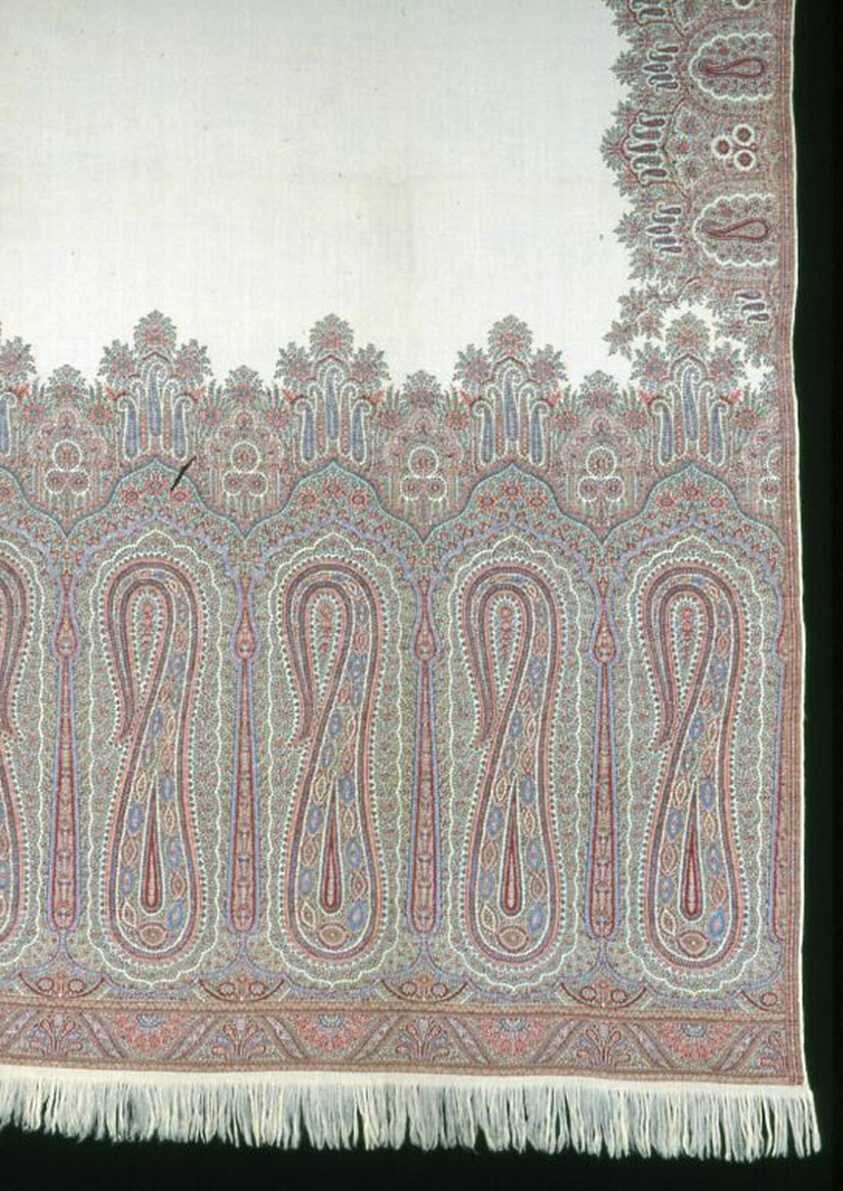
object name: Costume and Accessories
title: Long Shawl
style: 19th century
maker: Europe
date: 1833/66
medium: Cotton and wool, weft-float faced 1:3 'Z' twill weave with patterning wefts bound in weft-float faced 1:3 'Z' twill interlacings; attached ends of warp-float faced 2:2 'S' twill weave; warp fringe; woven on loom with Jacquard attachment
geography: Europe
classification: costume accessory; weaving; textile; costume; costume - weaving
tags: paisley